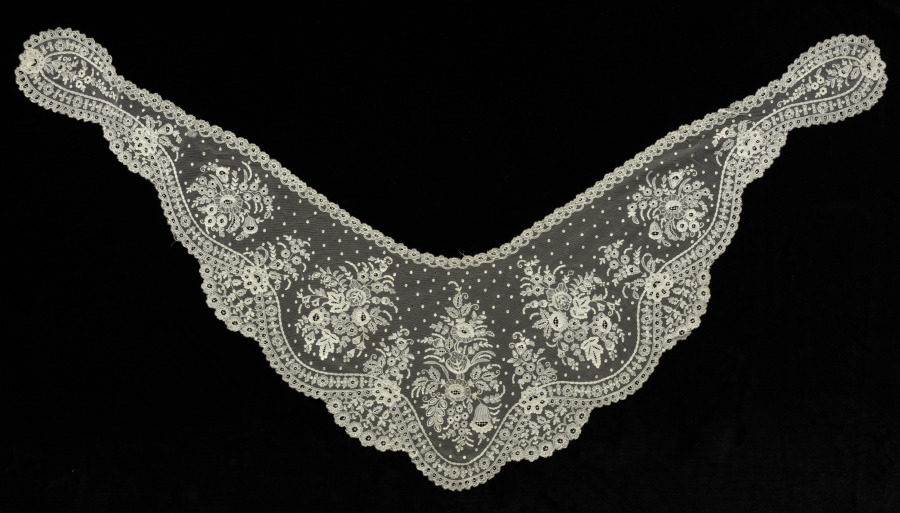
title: Lace Fichu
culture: Ireland, Limerick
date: 1800s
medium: Machine-made lace net with cotton embroidery in tambour stitch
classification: Lace